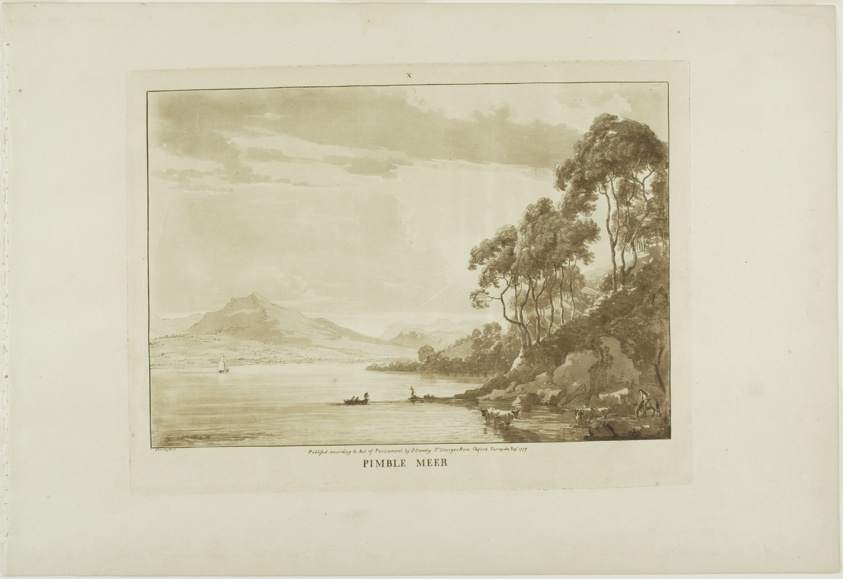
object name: Print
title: Pimble Meer, plate ten from Twelve Views in Wales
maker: Paul Sandby (English, 1731-1809)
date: 1777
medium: Aquatint on cream laid paper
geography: England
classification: aquatint; print; prints and drawing